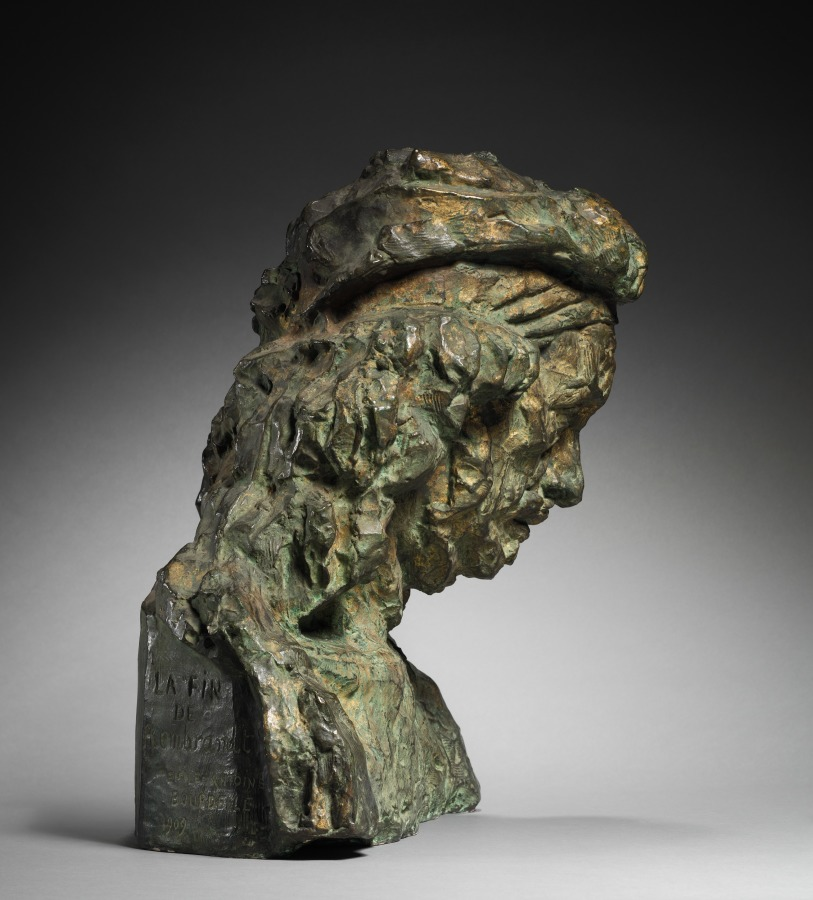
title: The End of Rembrandt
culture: France, 20th century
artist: Emile Antoine Bourdelle (French, 1861–1929)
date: 1909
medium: bronze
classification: Sculpture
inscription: Dated: "1909"